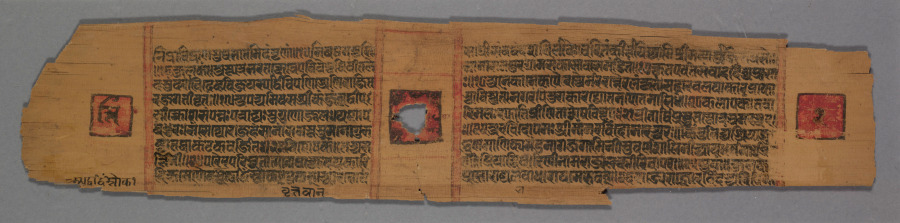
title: Text, folio 2 (verso) from a Parshvanatha Charitra (Life and Stories of Lord Parshva) of Bhavadeva-suri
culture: Western India, Gujarat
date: c. 1275–1300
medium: Gum tempera and ink on palm leaf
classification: Painting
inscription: [[verso, top line]] Nibaddham astabhih sargaih sambaddham daśabhir bhāvaiś caritam kīrtayiṣyāmi śrīmadpārśvajinarabhoḥ...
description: The nine lines of text on this page are written in Devanagari script. They are read from left to right, with each line of text spanning the entire length of the page. It introduces the story of the pious Marubhuti who, after passing through nine more lives, will be reborn as Parshva and reach liberation. The notation in the red squares of the margins indicate the folio number using two different systems. Corrections to the text copy made by later readers are jotted in the lower margin.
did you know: South Asian manuscripts are usually numbered on the verso; the Devanagari numeral 2 at the right is similar to the Arabic number.